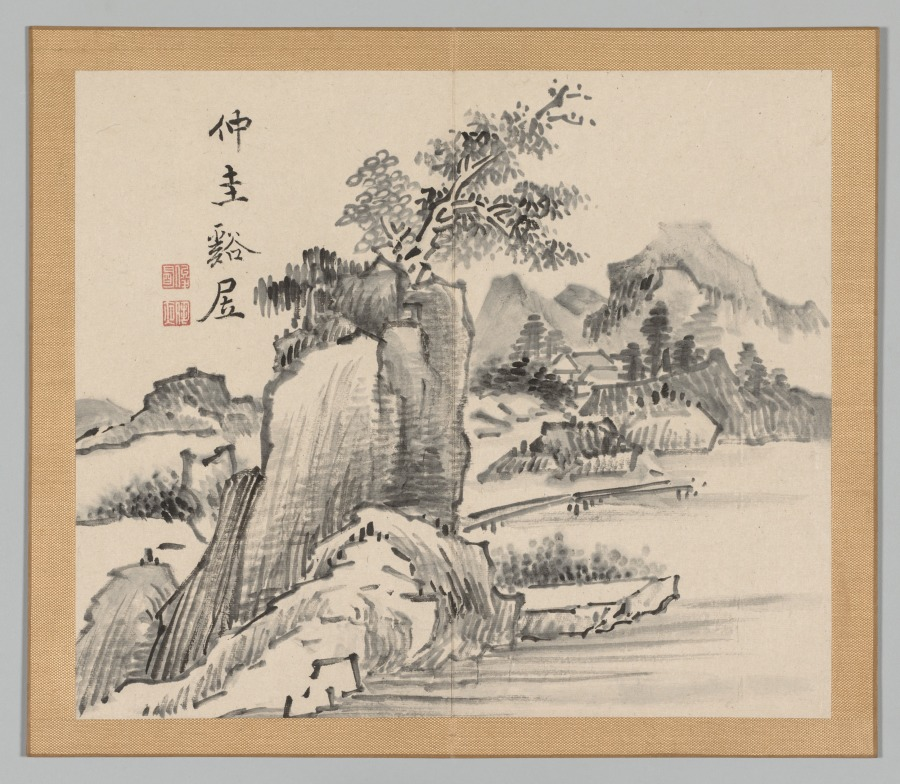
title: Reverberations of Taiga, Volume 2 (leaf 14)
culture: Japan, Edo period (1615–1868)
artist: Aoki Shukuya (Japanese, d. 1802)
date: mid- to late 1700s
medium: double-leaf from a pair of albums; ink and light color on paper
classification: Portfolio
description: Traditionally, young painters in Japan began their studies with an established master-painter. The master's compositions invariably became models that the apprentice copied to learn various ink and brush techniques. Shukuya was a pupil of the famous Kyoto artist Ikeno Taiga, whose style is reflected in these sketches of rocks, trees, and mountains.